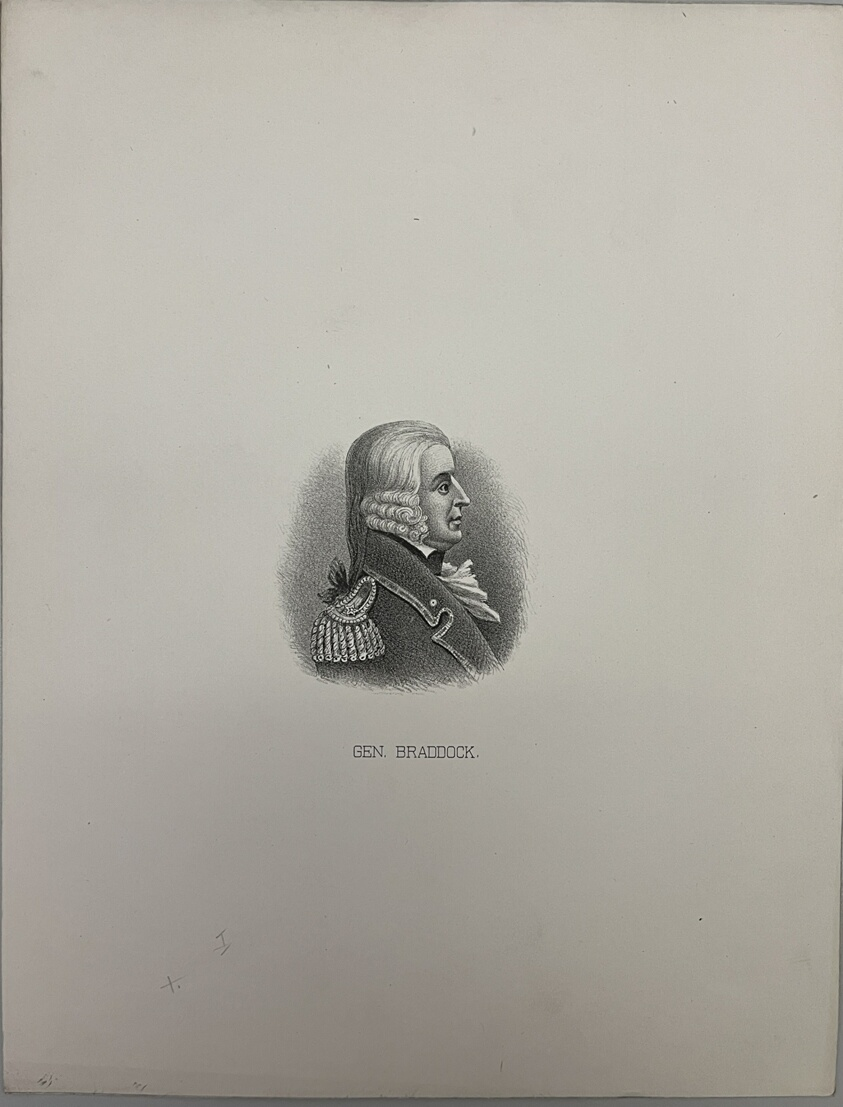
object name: Print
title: General Braddock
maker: Artist Unknown (Likely American or British, 19th century)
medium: Lithograph on paper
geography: United States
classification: reproduction; print; prints and drawing